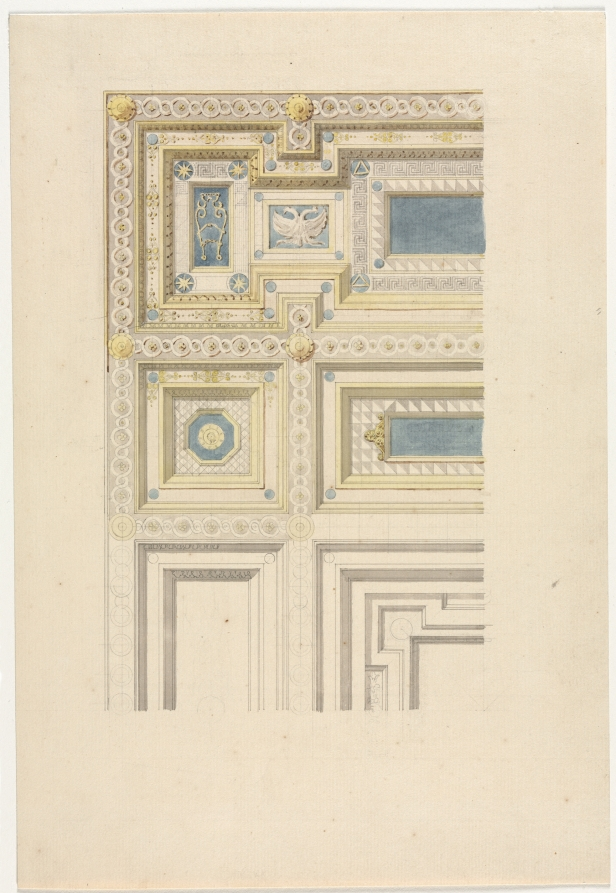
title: Design for Ornamental Ceiling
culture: France, 19th century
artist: Anonymous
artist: after Charles Percier (French, 1764–1838)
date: 19th century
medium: pen and gray ink and gray, blue and yellow wash over graphite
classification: Drawing